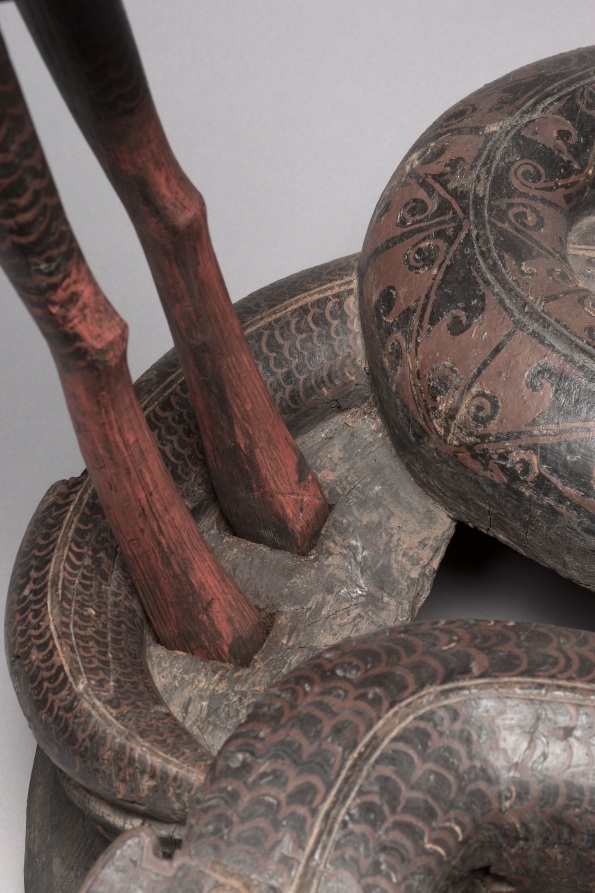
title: Cranes and Serpents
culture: China, reportedly from Hunan province, Changsha, Warring States period (475–221 BCE), State of Chu (c. 1046–223 BCE)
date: 475–221 BCE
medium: lacquered wood with polychromy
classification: Sculpture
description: A different style of ritual art developed in the state of Chu in South China. In addition to bronze vessels, lacquered wood artifacts expanded the repertory of ritual implements. This extraordinary sculpture was probably a drum stand for supporting a suspended drum in ritual ceremonies. It is unique among other excavated drum stands of the Chu, which typically show two birds standing on tigers. The theme of the bird stepping on the serpent was common in the Chu visual culture. Yet the slender proportions and seemingly flimsy structure of this particular set raise the question of whether it was utilitarian or mostly served symbolic functions in the tomb. The birds' and serpents' bodies have designs painted in red lacquer and yellow pigment against the black lacquer. Scientific analyses confirm the additional use of a blue or green pigment that has been discolored over time.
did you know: The cranes' long necks allowed a lightweight drum to be suspended from strings through the beaks, while the densely intertwined snakes provided a weighty base to stabilize the object during musical performances.